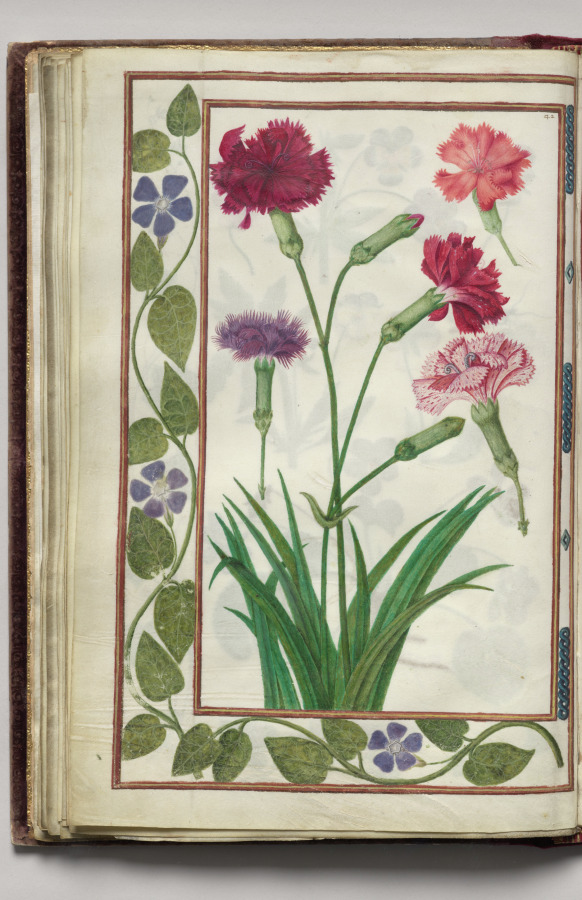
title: Dianthus with Periwinkle Border, folio 21 (verso), from Florilegium (A Book of Flower Studies)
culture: France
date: 1608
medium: watercolor, ink, silver, and gold over occasional traces of pencil, on vellum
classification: Bound Volume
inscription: Dated: Poitiers 1608 (on frontispiece) Signed: On frontispiece in black ink, lower right: Van Kuyk Notation on drawing: Frontispiece: in pencil, lower margin: * élève de Van Kessel, peintre flammand (* in pencil also appears in front of Van Kuyk's name).